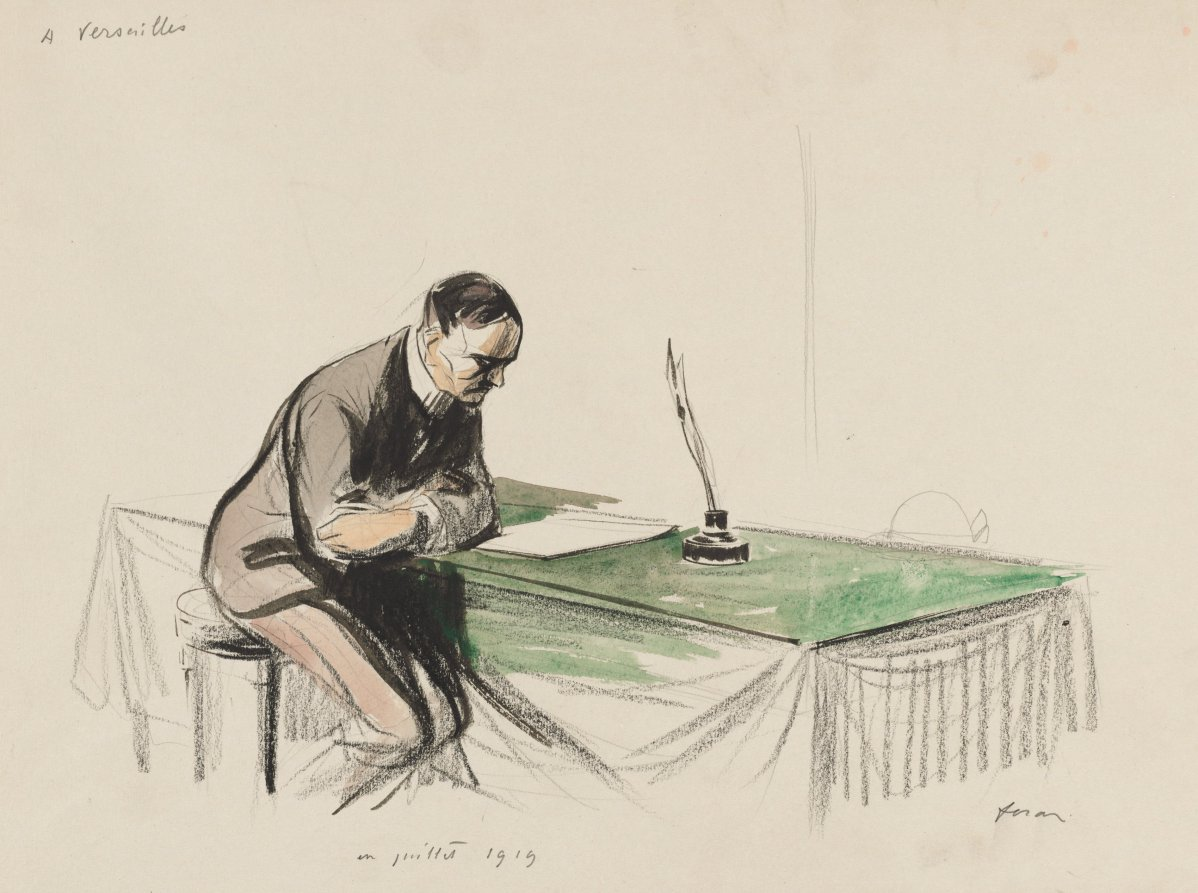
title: At Versailles, July 1919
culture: France, 20th century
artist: Jean Louis Forain (French, 1852–1931)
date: 1919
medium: black crayon, watercolor, and gouache, over graphite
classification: Drawing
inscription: signed, lower right in graphite: forain ; by artist, upper left, in graphite: A Verseilles ; by artist, lower center, in graphite: en juillet 1919 ; lower left, in graphite: La Doulourease. "Il se trompait: Elle est fraiche, mais pas joyeuse." ; lower right, in graphite: A2357